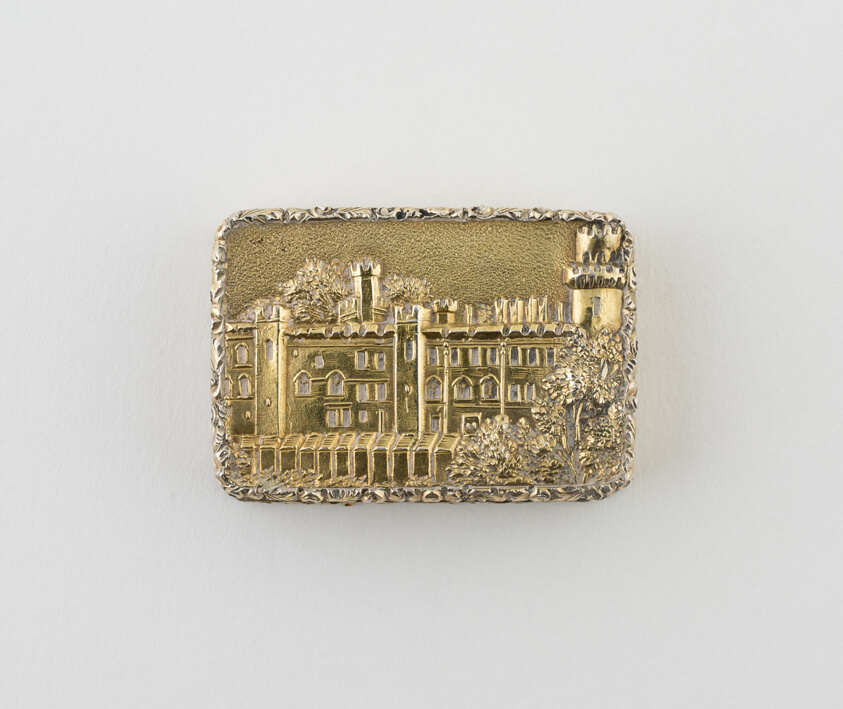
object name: Metalwork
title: Vinaigrette with View of Warwick Castle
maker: Nathaniel Mills; Birmingham, England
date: 1846/47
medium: Silver gilt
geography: Birmingham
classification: vinaigrette (container for health care); container for personal use; box; european decorative arts; metalwork; silver; decorative object/ornament